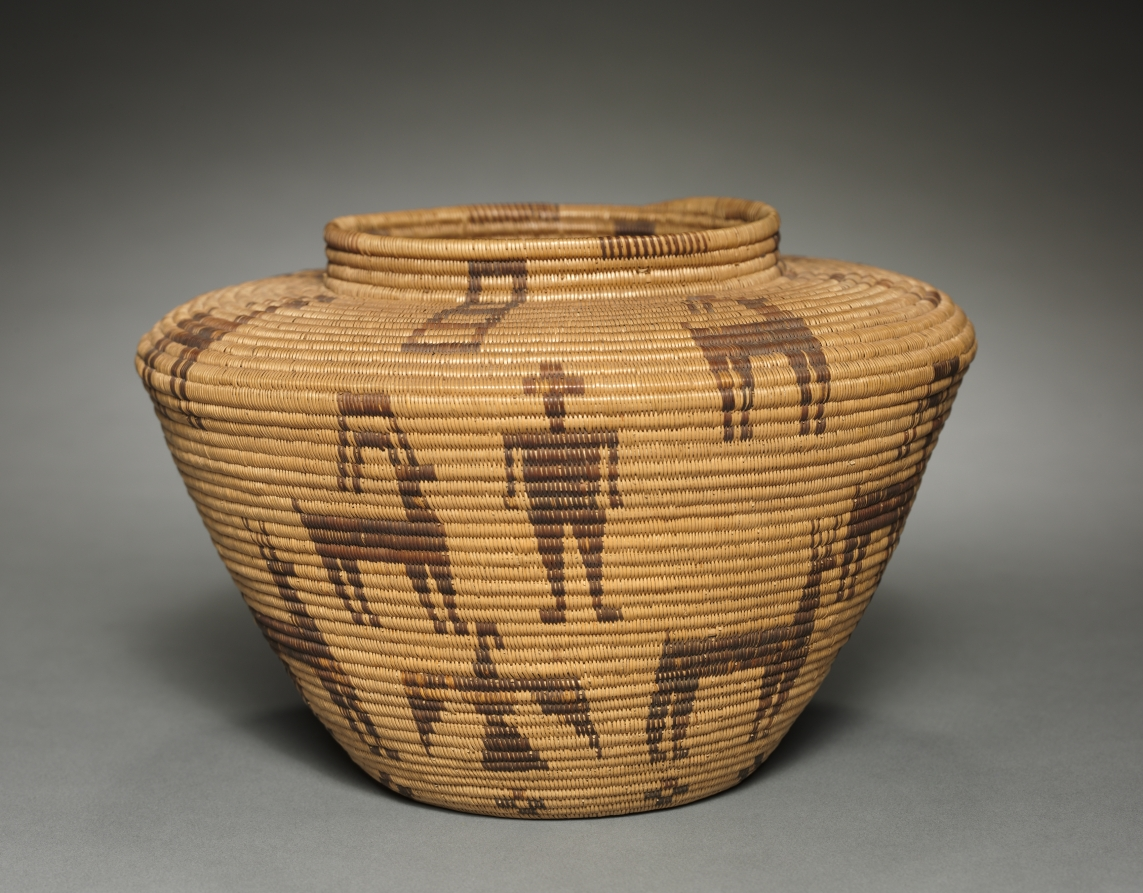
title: Jar-shaped Basket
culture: Native North America, Great Basin, California, Death Valley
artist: Sarah Hunter (Timbisha Shoshone (Panamint), 1883–1967)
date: 1910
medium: Willow, bulrush; coiled (3 rods)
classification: Basketry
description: Sarah Hunter’s basketry is noted for geometricized motifs reminiscent of the animals depicted in petroglyphs on canyon walls in the Death Valley region. Here they include pronghorn mountain sheep, deer, and birds, along with humans, all created in light-brown bulrush against a honey-colored willow ground. Traditional Indigenous basket weavers, who have exhaustive knowledge of the plant world, tend, harvest, and prepare their own materials. If stages of the process are not done properly and at the right time, color will be uneven and stitches will twist and split.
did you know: Some Timbisha Shoshone women continue traditions of basket weaving to the present day.